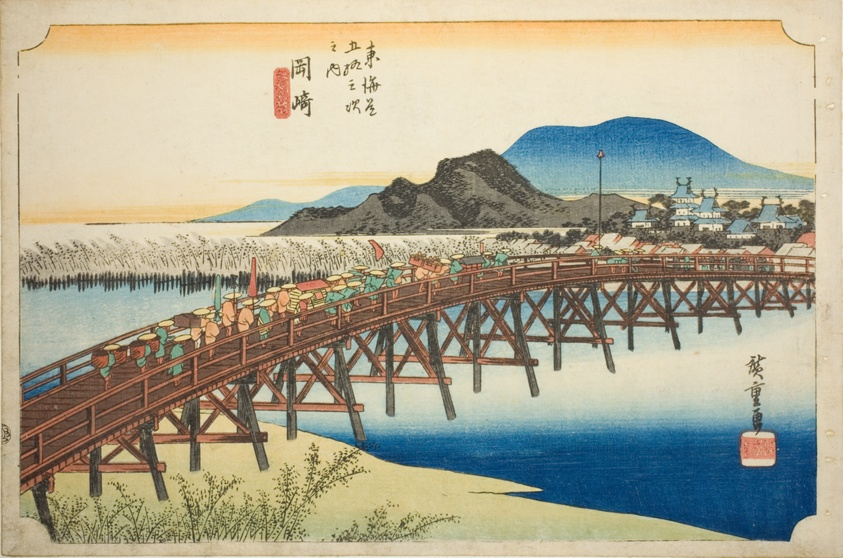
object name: Print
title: Okazaki: Yahagi Bridge (Okazaki, Yahagi no hashi), from the series "Fifty-three Stations of the Tokaido (Tokaido gojusan tsugi no uchi)," also known as the Hoeido Tokaido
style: Japanese (culture or style)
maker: Utagawa Hiroshige 歌川 広重; Japanese, 1797-1858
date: c. 1833/34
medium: Color woodblock print; oban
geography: Japan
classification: woodblock print; print; asian art